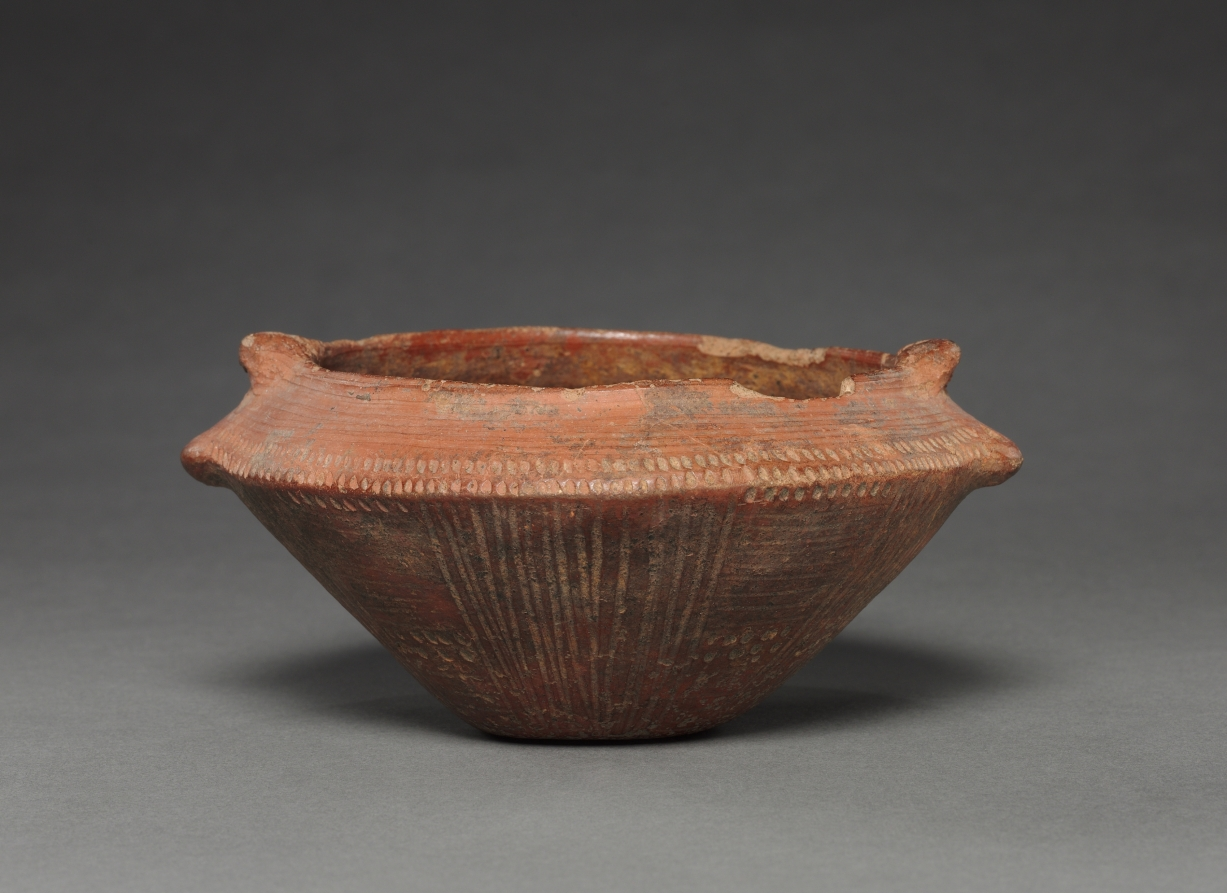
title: Dish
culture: Colombia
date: before 1550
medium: red ware with incised patterns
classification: Ceramic